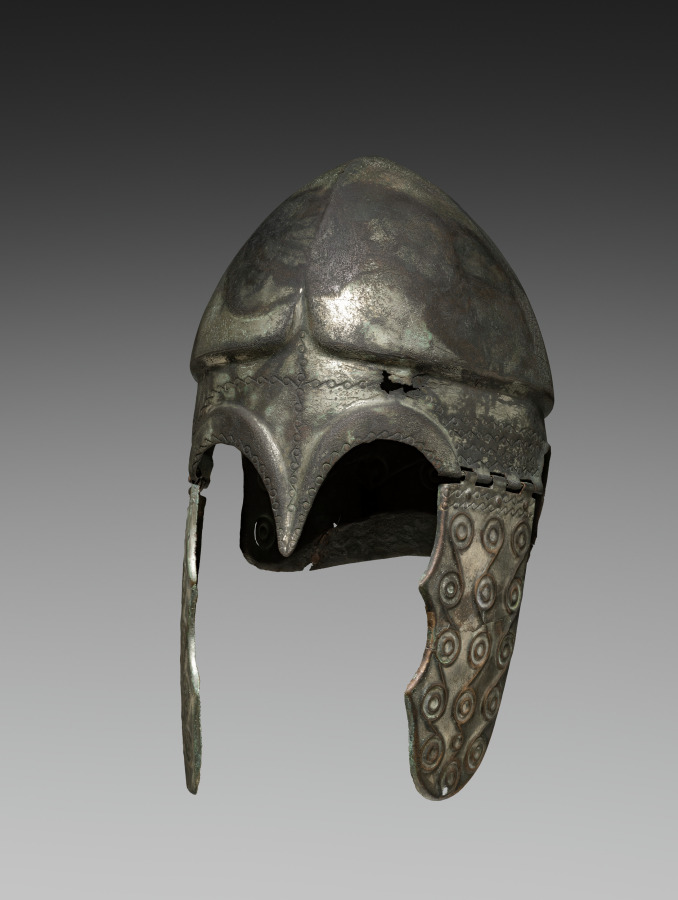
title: Chalcidian Helmet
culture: Greek (perhaps Black Sea area)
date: c. 350–200 BCE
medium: Tinned bronze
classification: Arms and Armor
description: Among ancient helmets, the Chalcidian type is varied, widespread, and comparatively unrestrictive, with relatively wide openings for the eyes and ears. This example, probably made in the Black Sea region or even further east, features a pointed noseguard, high carinated crown, molded brow ridge, and everted rear flange, plus large separately made hinged cheekpieces. The tinned bronze surface is almost silver in color, with extensive decoration including small incised linked scrolls and much larger embossed linked scrolls.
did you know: Although named for Chalcis, a city in Euboia, Chalcidean helmets were made across the Greek world.